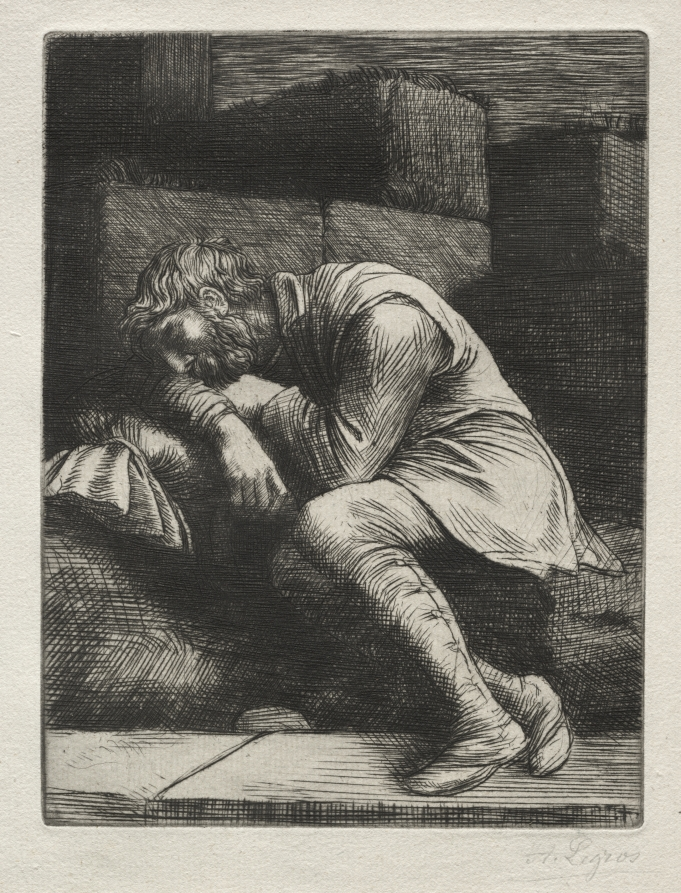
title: The Sleeping Beggar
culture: France, 19th-20th century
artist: Alphonse Legros (French, 1837–1911)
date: c. 1857–1911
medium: etching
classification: Print